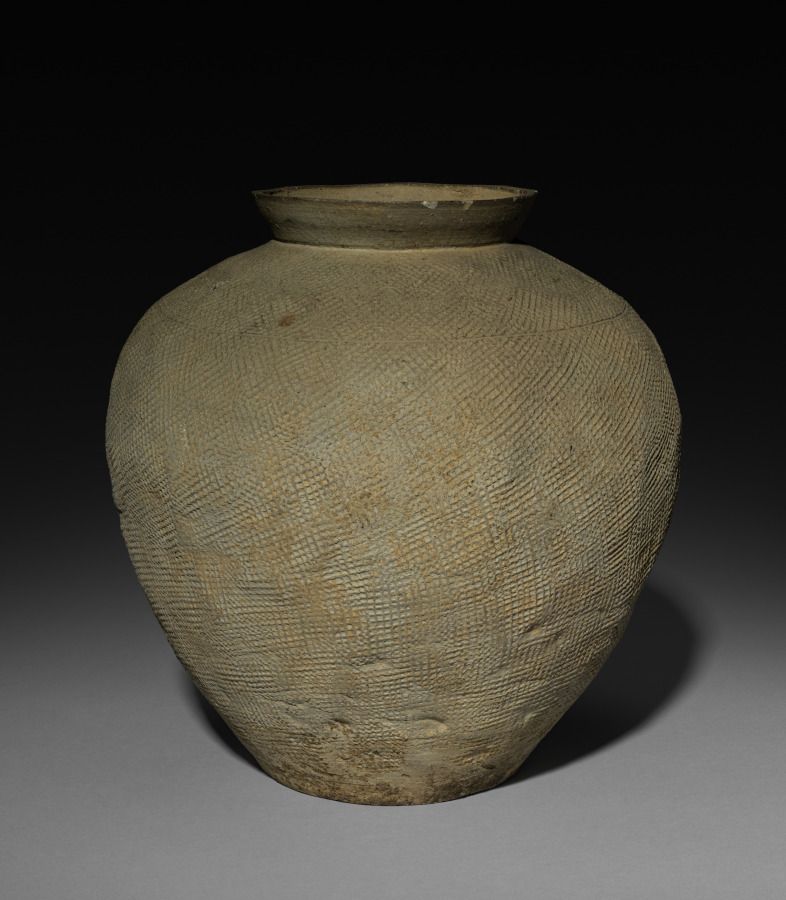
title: Jar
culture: China, Hunan province, reportedly Changsha, Eastern Zhou dynasty (770–256 BCE), Warring States period (475–221 BCE)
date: 481–221 BCE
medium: earthenware with stamped decoration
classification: Ceramic